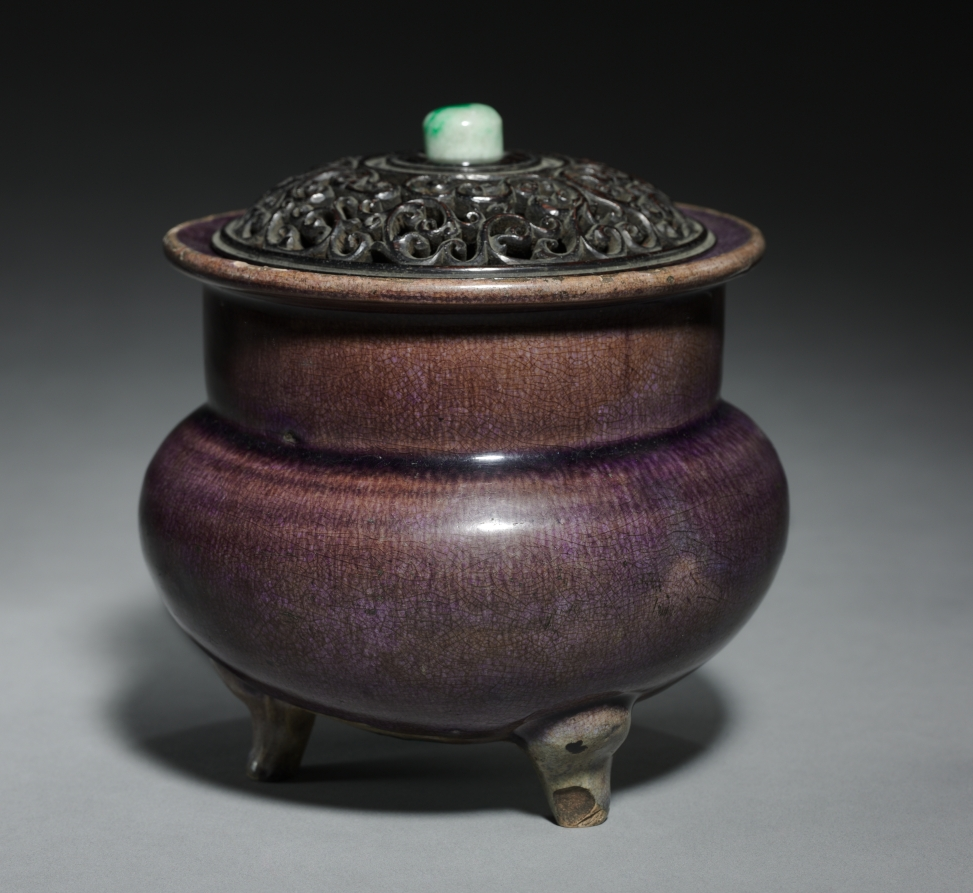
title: Tripod: Ding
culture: China, Ming dynasty (1368–1644)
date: 1368–1644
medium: porcelain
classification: Ceramic